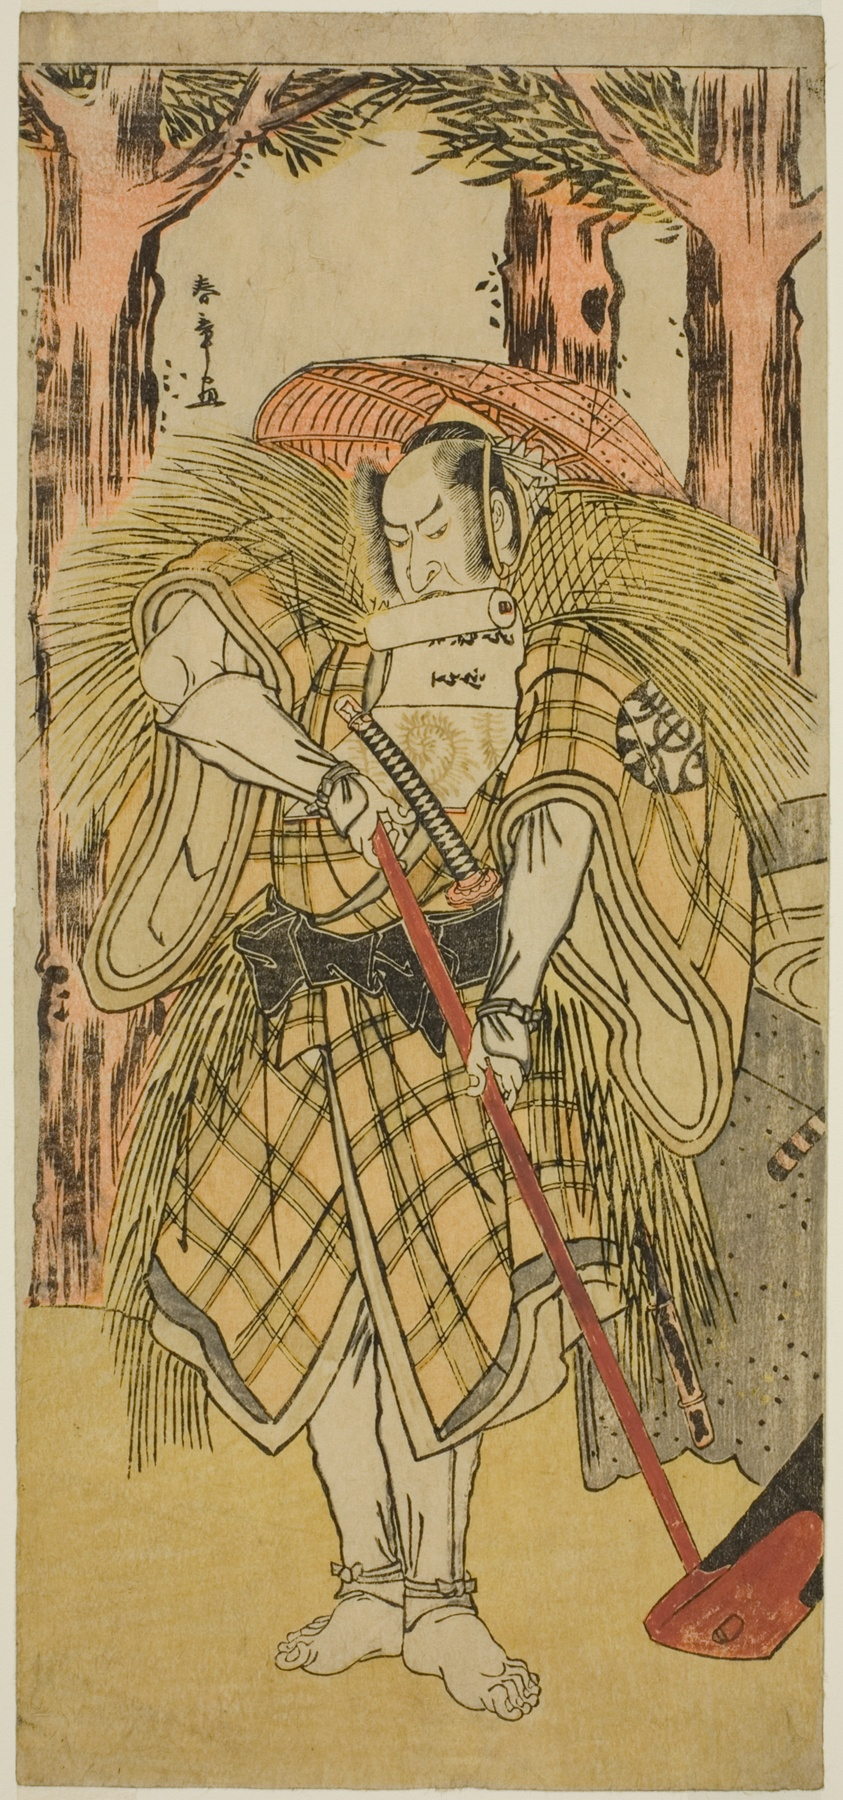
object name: Print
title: The Actor Nakamura Nakazo I as Hakamadare Yasusuke or Watanabe no Tsuna (?) in the Play Shintenno Tonoi no Kisewata (?), Performed at the Nakamura Theater (?) in the Eleventh Month, 1781 (?)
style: Japanese (culture or style)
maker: Katsukawa Shunsho 勝川 春章; Japanese, 1726-1792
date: c. 1781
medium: Color woodblock print; hosoban; left sheet of diptych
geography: Japan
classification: woodblock print; print; asian art